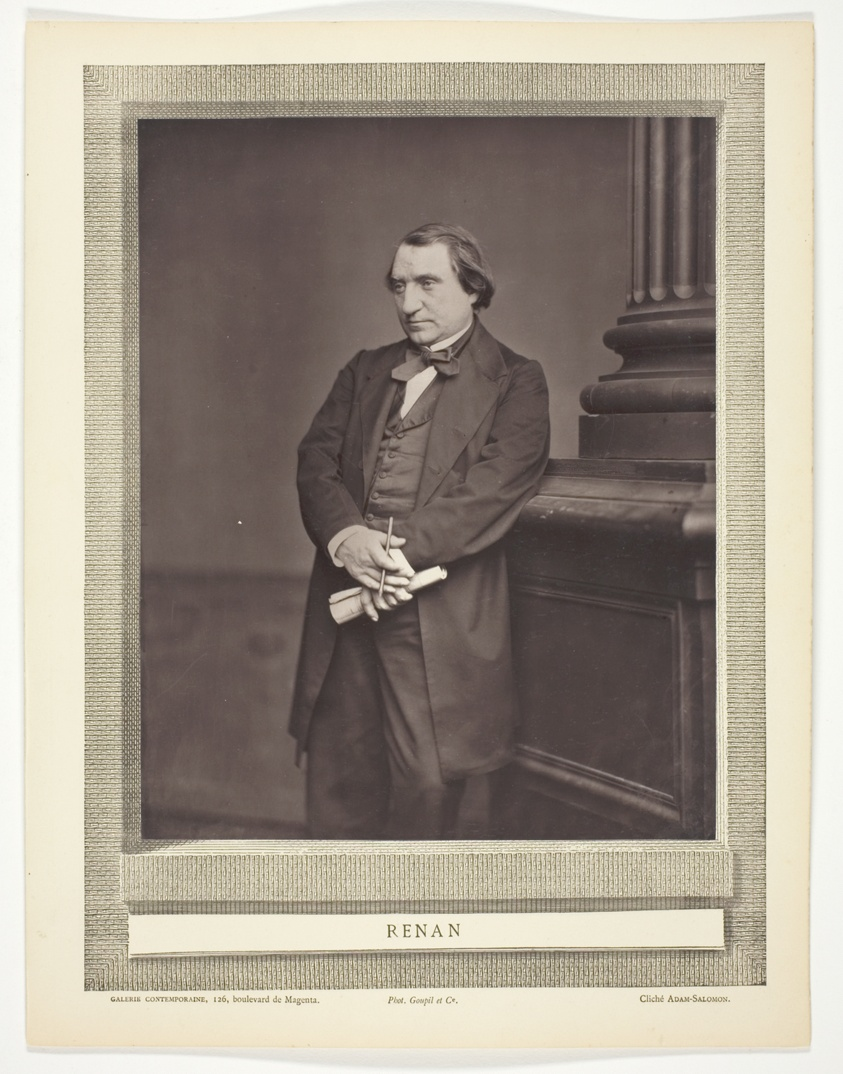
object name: Photograph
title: Renan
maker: Antoine Samuel Adam-Salomon (French, 1811–1881)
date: c. 1976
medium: Woodburytype, from the periodical “Galerie Contemporaine Littéraire, Artistique” (1876), volume 3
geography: France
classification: woodburytype; photomechanical process; photography; photograph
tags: Collected by Hugh Edwards, Contemporaine Littéraire